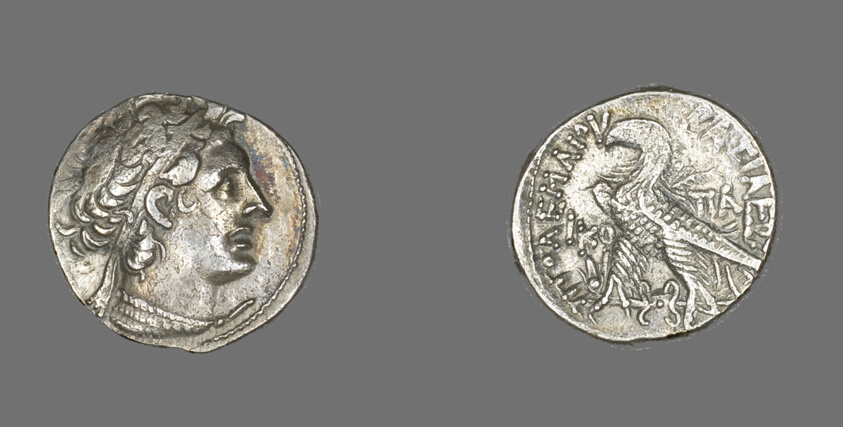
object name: Coin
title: Tetradrachm (Coin) Portraying King Ptolemy I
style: ptolemaic, ancient, greek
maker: Greek, Ptolemaic; minted in Egypt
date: Ptolemaic Period (53–52 BCE), issued by King Ptolemy XII Auletes, Reign of Ptolemy XII Auletes (80–51 BCE)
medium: Silver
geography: Egypt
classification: coin; ancient art